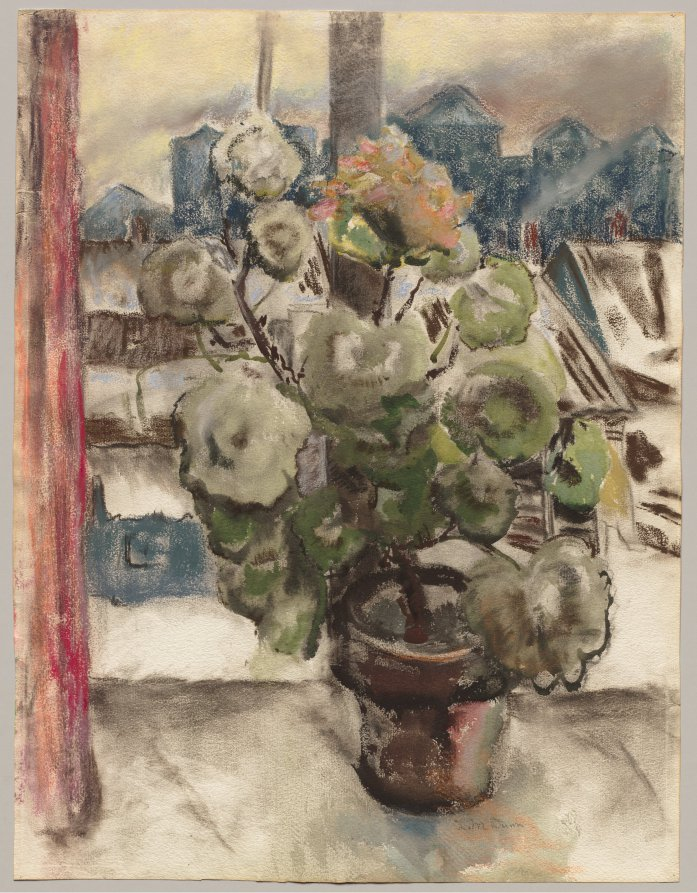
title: The Geranium in My Window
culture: America, Ohio, Cleveland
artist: Louise M. Dunn (American, 1875–1962)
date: c. 1930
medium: pastel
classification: Drawing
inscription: Signed "L.M. Dunn" lower right